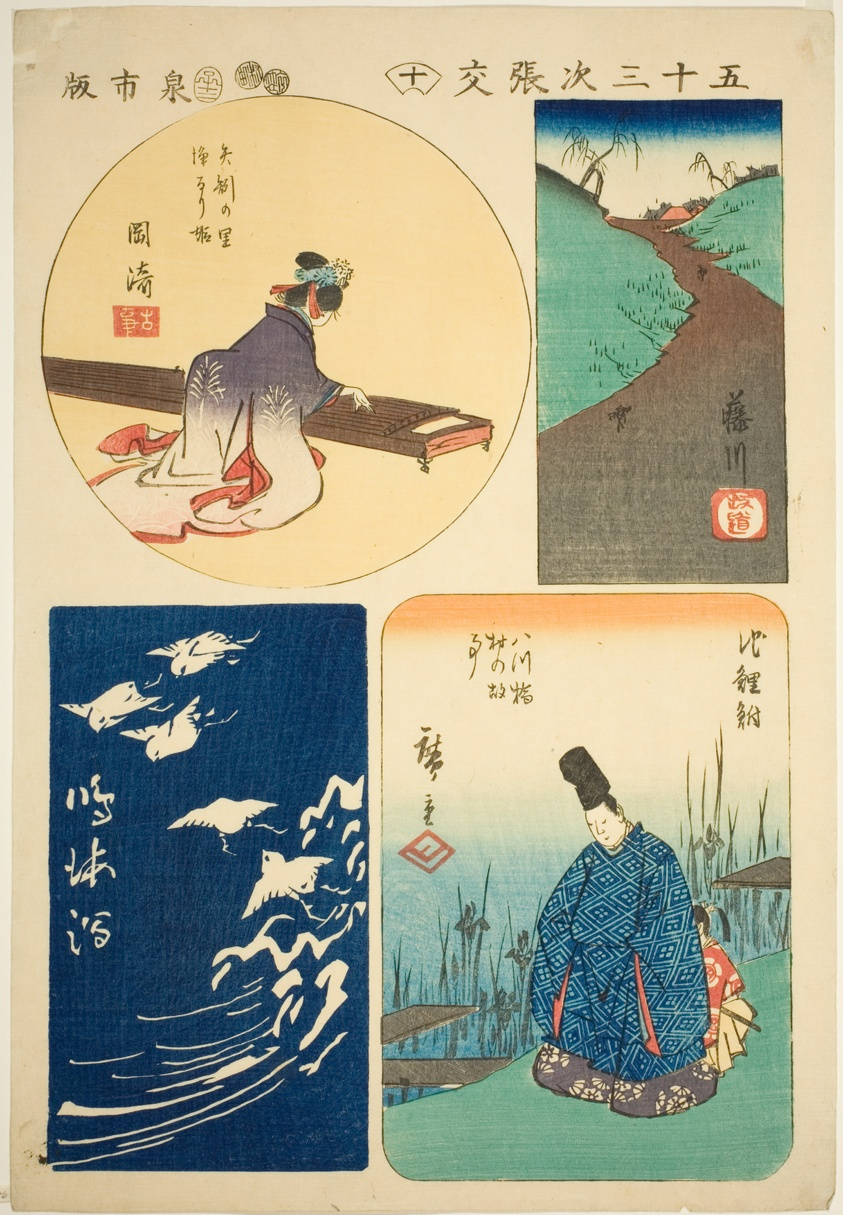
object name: Print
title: Okazaki, Fujikawa, Narumi, and Chiryu, no. 10 from the series "Cutouts of the Fifty-three Stations (Gojusan tsugi harimaze)"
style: Japanese (culture or style)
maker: Utagawa Hiroshige 歌川 広重; Japanese, 1797-1858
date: 1852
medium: Color woodblock print; oban, harimaze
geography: Japan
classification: woodblock print; print; asian art